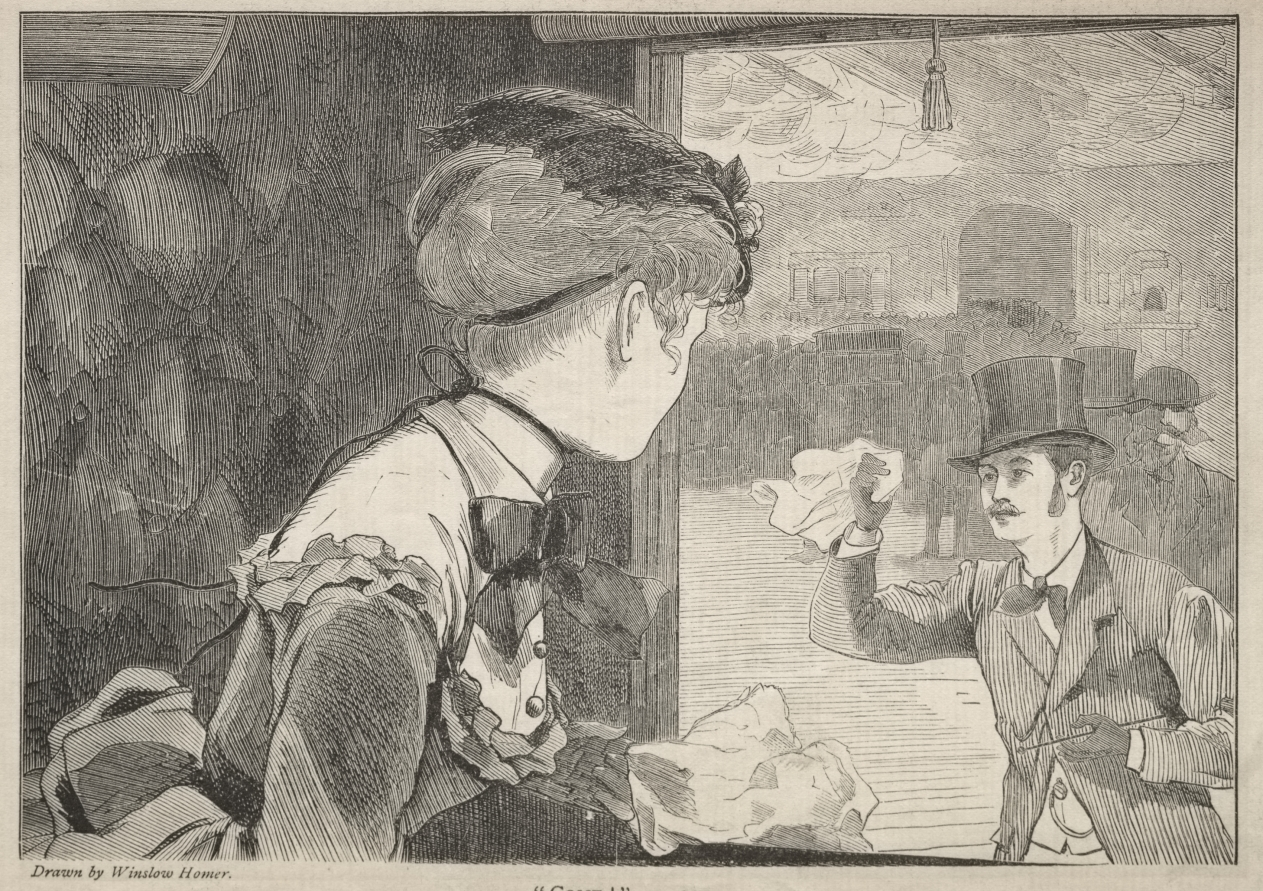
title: "Come!"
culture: America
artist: Winslow Homer (American, 1836–1910)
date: 1869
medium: wood engraving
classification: Print